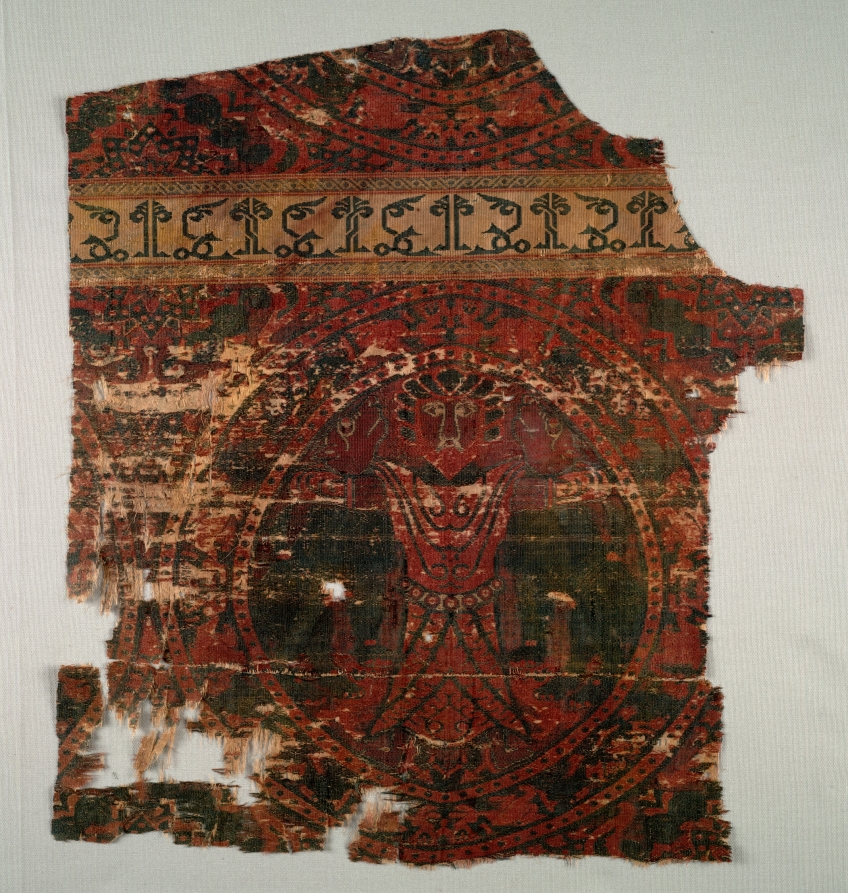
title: Fragment with Lion Strangler from a Dalmatic of Saint Bernard Calvo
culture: Spain, Almeria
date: 1200–1243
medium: Silk and gold thread: lampas, taqueté, and plain-weave variant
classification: Textile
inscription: the inscription (incorrectly written) appears to read "al-'amir" (command, i.e. authority) [alternately retrograde and vice versa].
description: Within the elaborate roundel, a bearded man with a belted tunic strangles a lion in each hand. Gold thread shimmers on their heads and his hands. In the inscription band across the top, an Arabic word has been written with mirror-image symmetry. It can be read as al-yumn, primarily translated as prosperity. The central motif of this renowned silk is a pre- Islamic Persian symbol of royal power. Both Muslims and Christians throughout the Iberian Peninsula admired such textiles. Members of the Catholic clergy incorporated it into a dalmatic—a long ceremonial tunic. It was found in the late 1800s in the tomb of Saint Bernard Calvo, Bishop of Vich (1180–1243).